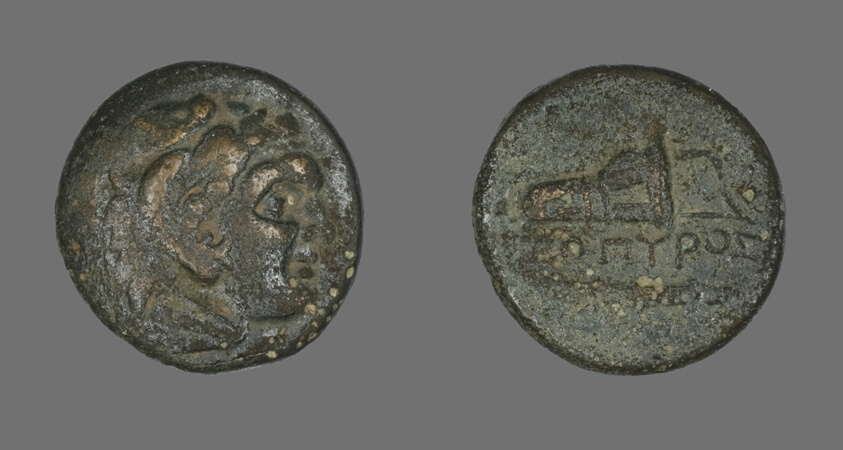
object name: Coin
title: Coin Depicting the Hero Herakles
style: greek, ancient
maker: Greek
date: 4th century BCE and later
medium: Bronze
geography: Ancient Greece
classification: coin; ancient art